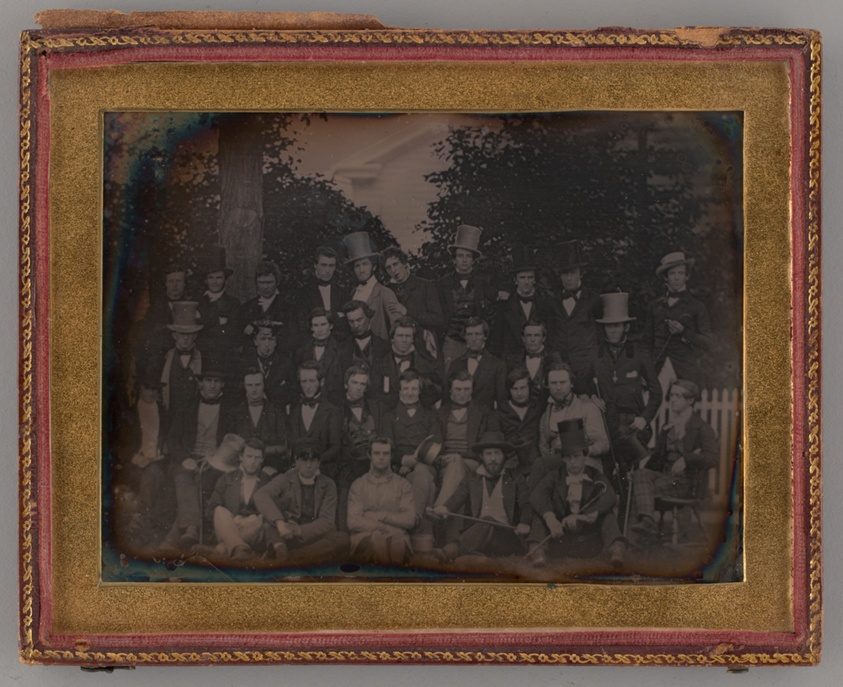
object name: Photograph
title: Untitled (Group Portrait of Men)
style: 19th century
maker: Unknown maker; American, 19th century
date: 1848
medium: Daguerreotype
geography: United States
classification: portrait; photograph; photographic process; photography; portrait; daguerreotype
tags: lundberg collection, portraits: multiple subjects, portraits: male subject, portrait, photography, men, Male, portraits